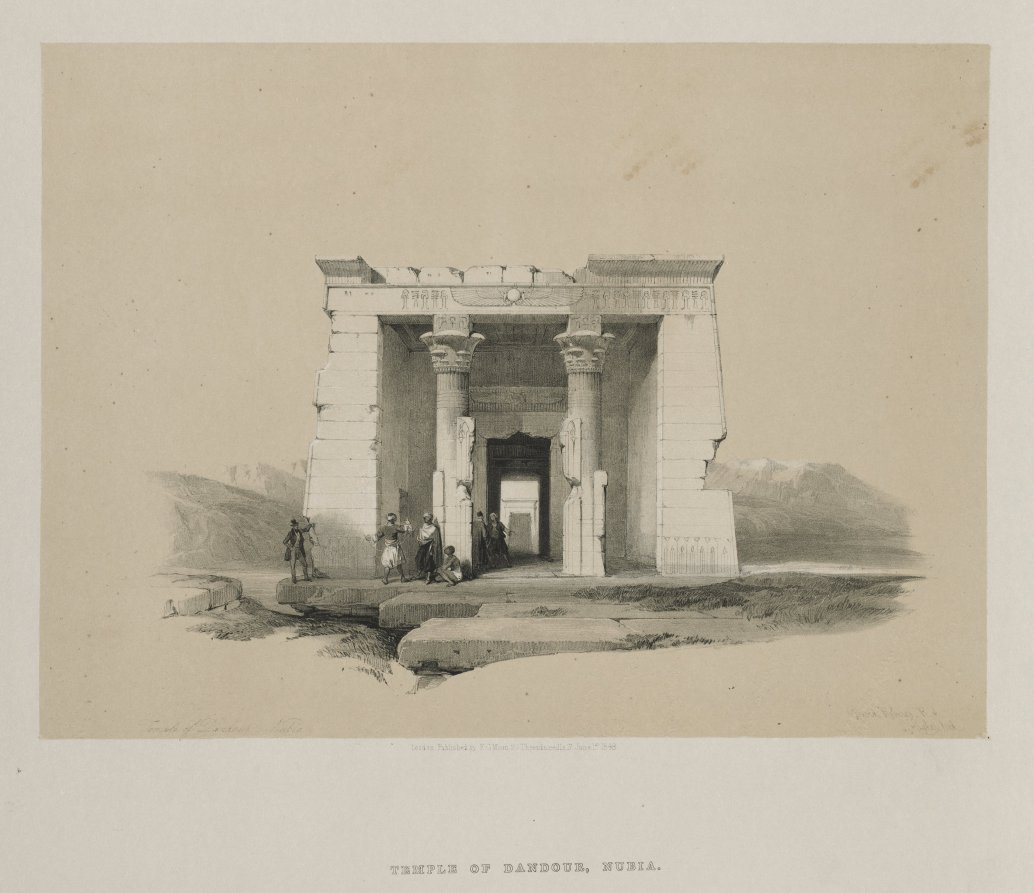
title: Egypt and Nubia, Volume II: Temple of Dandour, Nubia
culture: England, 19th century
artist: Louis Haghe (British, 1806–1885)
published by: F. G. Moon, 20 Threadneedle Street, London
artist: after David Roberts (Scottish, 1796–1864)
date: 1848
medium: color lithograph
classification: Print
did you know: Once a temple for the ancient Egyptian religion, the temple of Dendur was used as a Coptic Christian church in the sixth century CE.